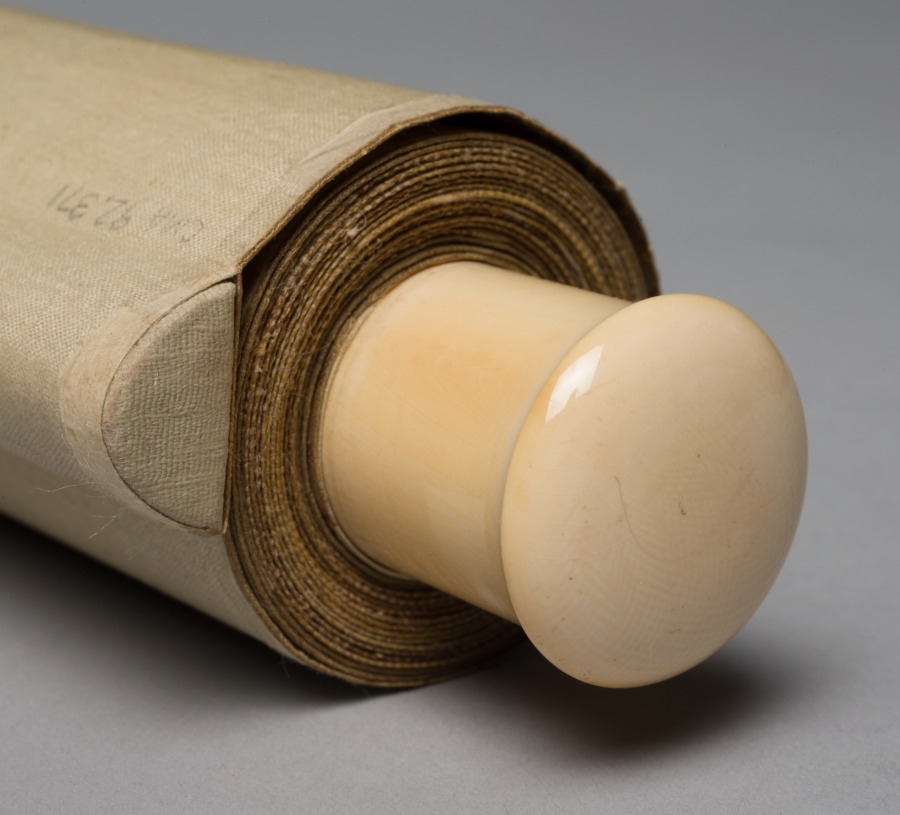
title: A Samurai on Horseback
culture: Japan, Edo period (1615–1868)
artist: Kusumi Morikage (Japanese, active c. 1620–1690)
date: mid- to late 1600s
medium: hanging scroll; ink and slight color on paper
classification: Painting